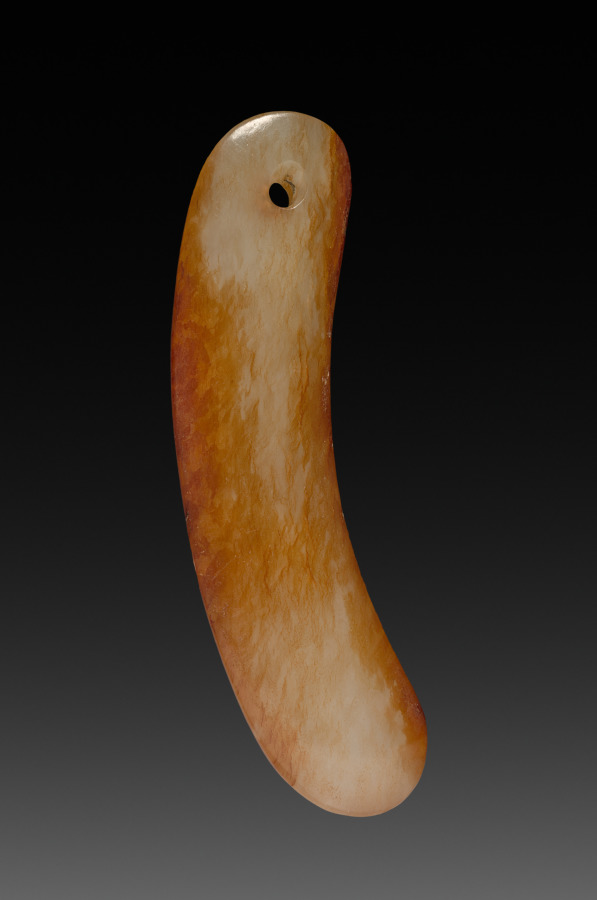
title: Bean-Shaped Bead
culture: China, Han dynasty (202 BCE–220 CE)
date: 206 BCE–220 CE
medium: jade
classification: Jade